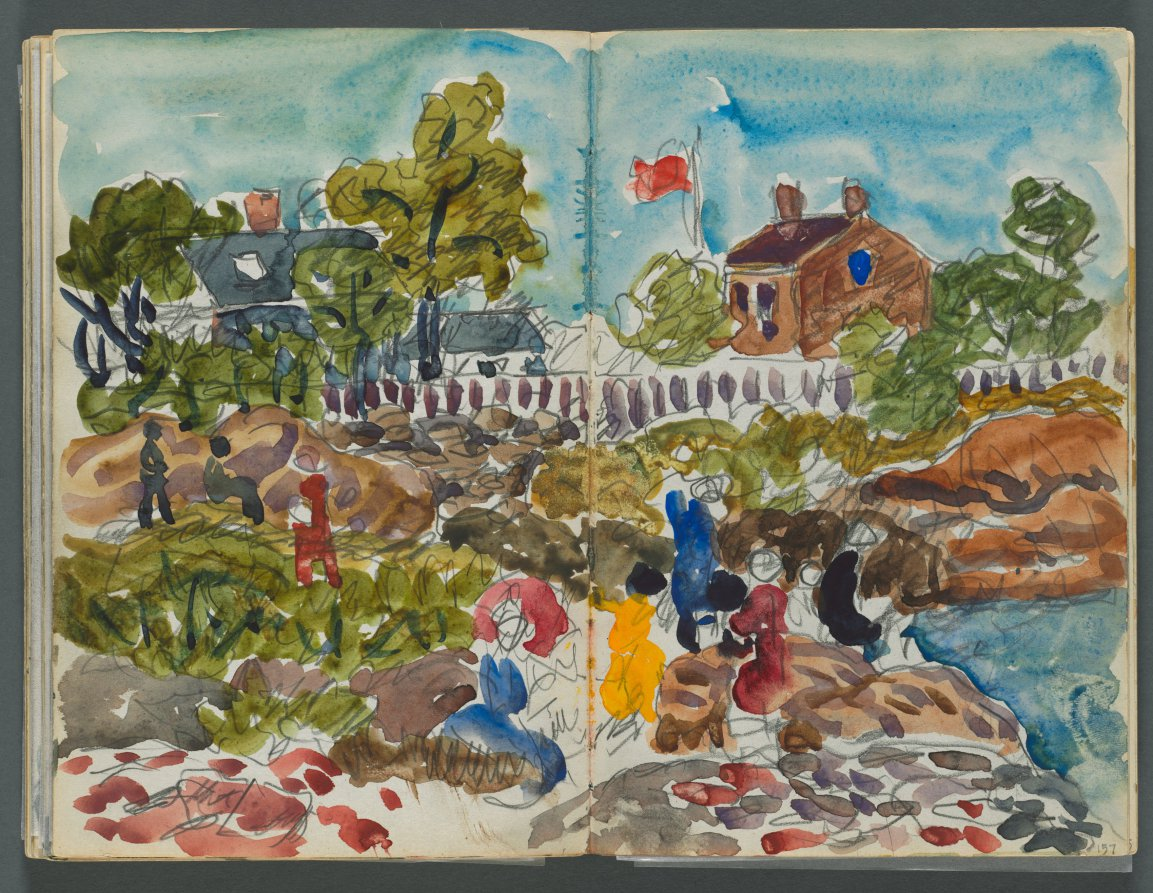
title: Sketchbook, The Dells, N° 127, page 156 & 157: Coastal Landscape with Figures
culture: America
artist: Maurice Prendergast (American, born Newfoundland [now Canada], 1858–1924)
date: c. 1919–1921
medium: graphite and watercolor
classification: Bound Volume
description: This sketchbook contains 59 pages of graphite drawings and 16 watercolors made at various locations on Cape Ann, Massachusetts.